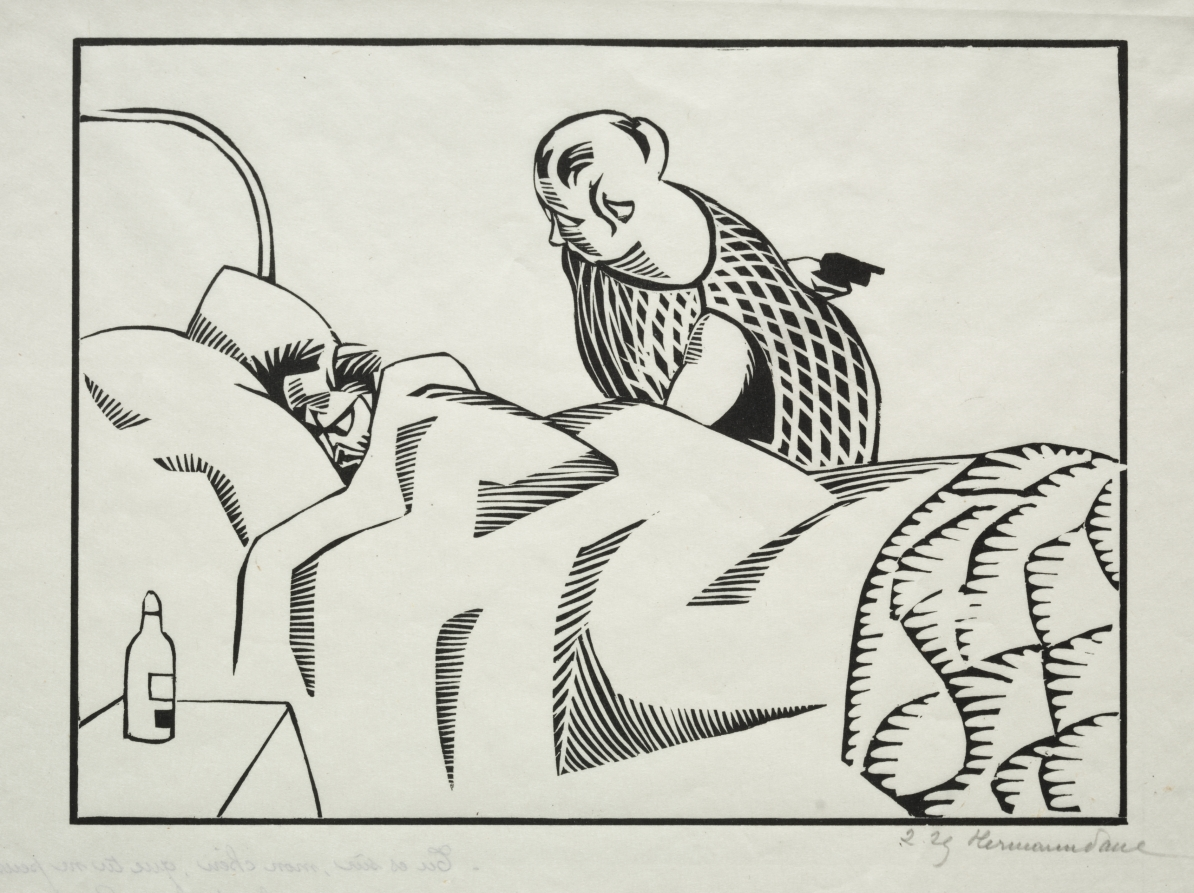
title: You are sure my dear that you cannot think of anything more to help the pain?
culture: France, 20th century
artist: Hermann Paul (French, 1864–1940)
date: c. 1920s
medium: woodcut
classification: Print